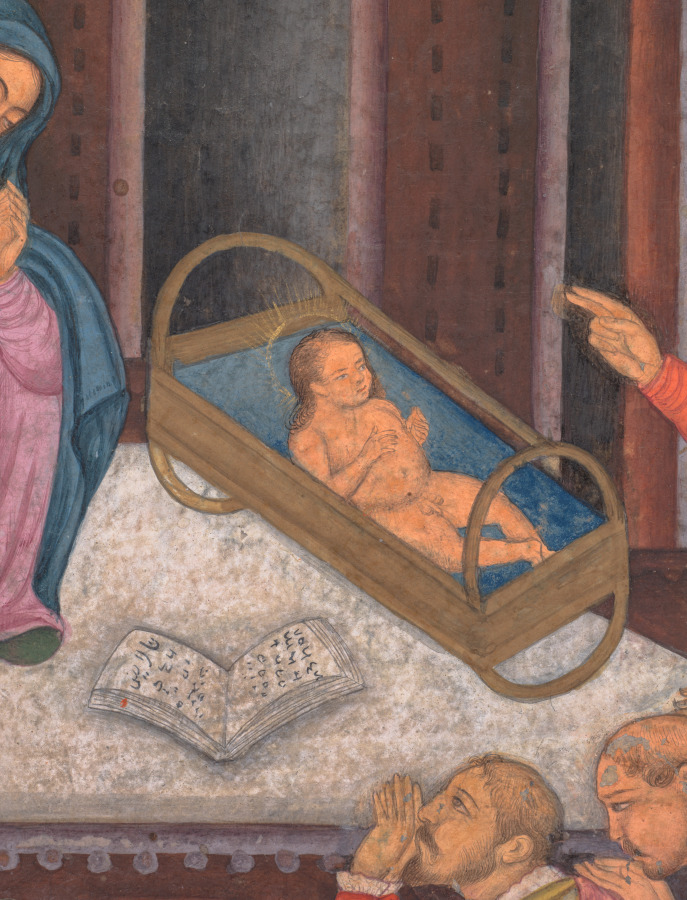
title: The Adoration of the Magi, from a Mirror of Holiness (Mir’at al-quds) of Father Jerome Xavier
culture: Northern India, Uttar Pradesh, Allahabad, Mughal period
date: 1602–4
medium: Gum tempera, ink, and gold on paper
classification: Manuscript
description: In this Nativity scene, familiar in Christian contexts, Mary and Joseph present the infant Jesus to the three Magi, who have placed their crowns on the ground in homage to the King of Kings. The three Magi are portrayed in Portuguese costumes to indicate to a Mughal audience that they are foreigners who believed in Christ. The artist cleverly and humorously indicates that the Magi have just arrived in Bethlehem by depicting their three camels in the bottom corner. One exhausted camel’s tongue hangs out the side of his mouth, while the other two animals lean eagerly toward a pair of water jugs.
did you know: The books next to newborn Jesus indicate that his birth fulfills a prophecy.